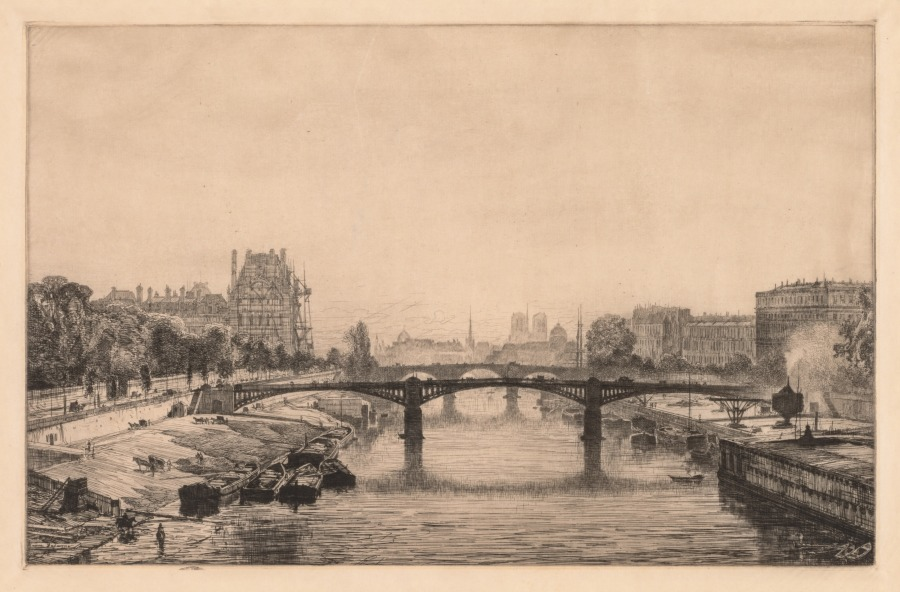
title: Paris, View from the Concorde Bridge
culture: France, 20th century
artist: Maxime Lalanne (French, 1827–1886)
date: 1866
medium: etching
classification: Print